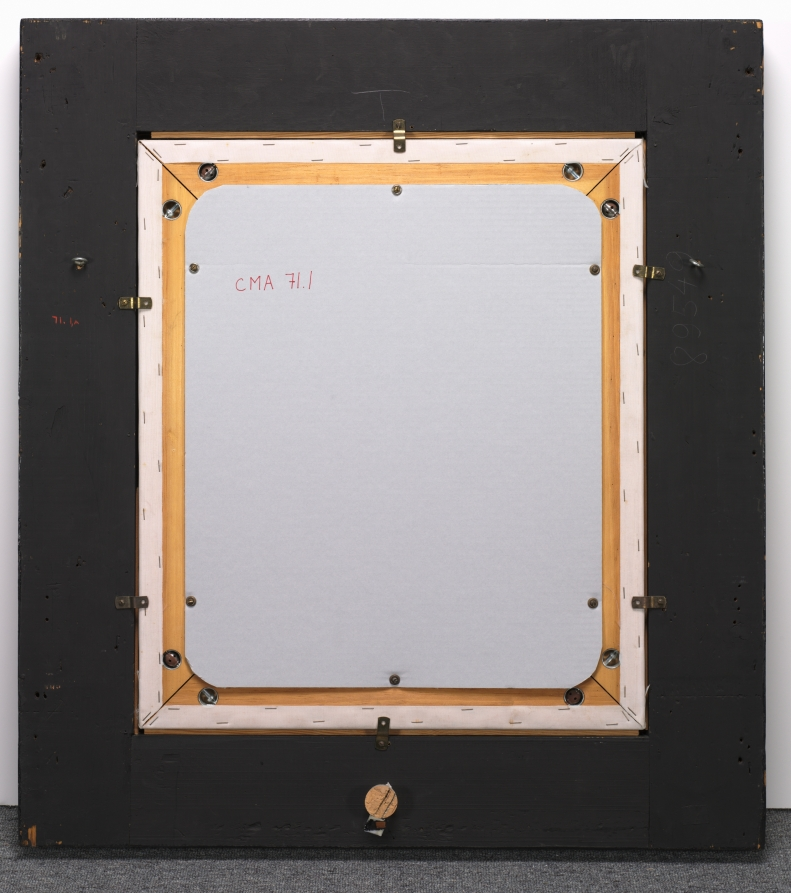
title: Interior of a Church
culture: Netherlands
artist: Emanuel de Witte (Dutch, c. 1617–1692)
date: c. 1680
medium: oil on canvas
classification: Painting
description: Although this spacious church interior is largely imaginary, Emanuel de Witte’s precise description of architectural forms convinces us that he depicted an actual place. To create a sense of familiarity, he included some specific architectural features from the Oude Kerk (Old Church) in Amsterdam. In the late 1500s, militant Protestant sects occupied Catholic churches in the Netherlands and stripped them of rich decorations and “idolatrous” images. The resulting spare, whitewashed interiors became a favorite subject of Dutch artists, who were intrigued by the interplay of light and shadow over the unadorned walls, and by the challenge of depicting perspectival space.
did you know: In the 1600s, Dutch churches functioned as public gathering places—even dogs were allowed!